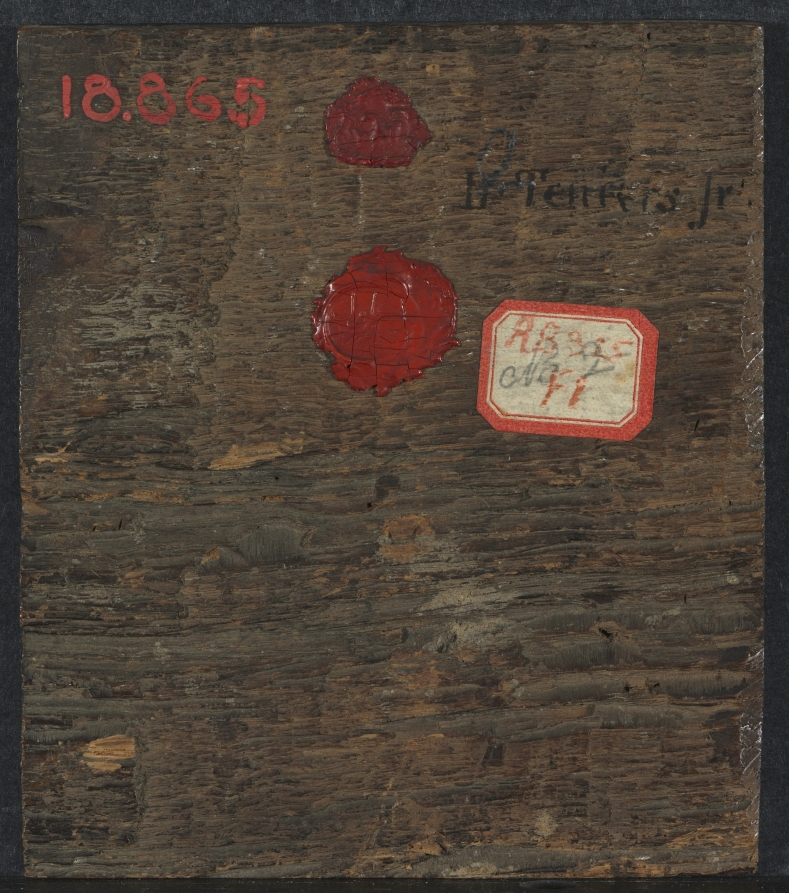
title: Old Man and Woman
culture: Flanders, probably painted in the 18th century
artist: imitator of David Teniers (Flemish, 1610–1690)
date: 1700s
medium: oil on wood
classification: Painting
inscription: Initialed in top right corner with David Teniers's monogram.